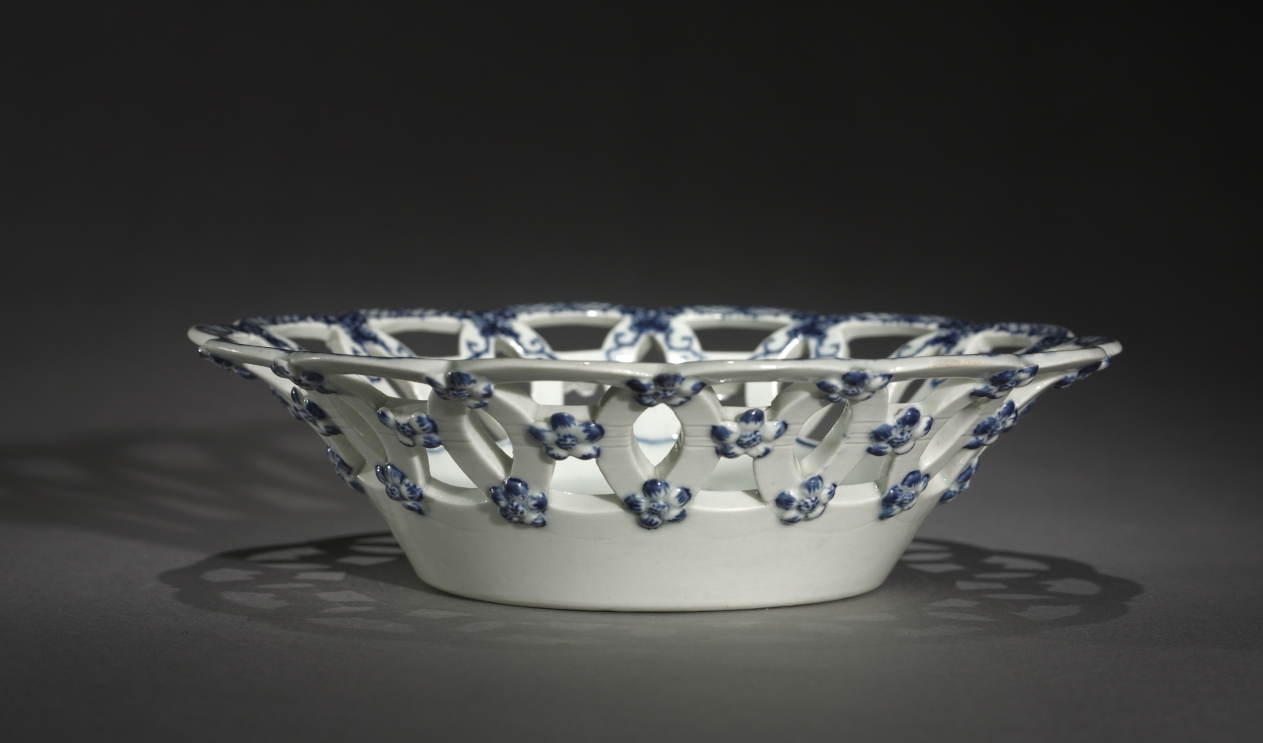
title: Fruit Bowl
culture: England, Worcester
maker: Worcester Porcelain Factory (British, established 1751)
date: c. 1750–70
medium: porcelain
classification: Ceramic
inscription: Blue half moon mark on bottom